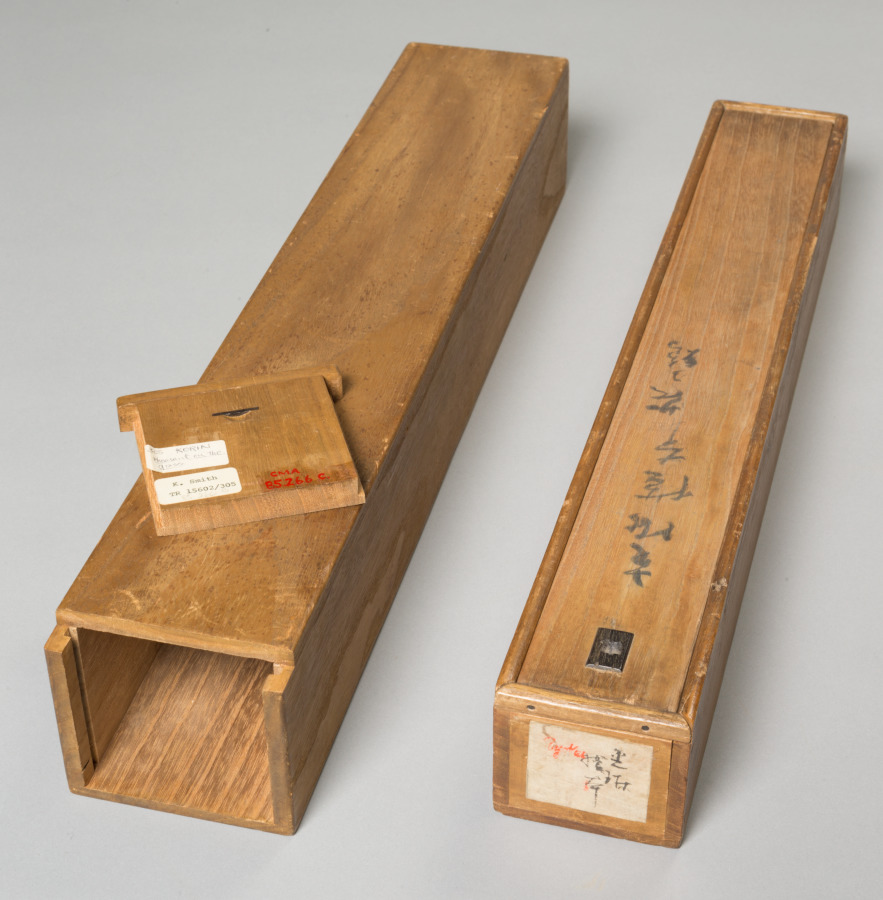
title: Pheasant and Grasses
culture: Japan, Edo period (1615–1868)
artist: attributed to Ogata Kōrin (Japanese, 1658–1716)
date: late 1600s–early 1700s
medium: hanging scroll; ink and color on paper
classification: Painting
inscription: two seals of artist, lower right.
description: Korin was a founder of the Rimpa (decorative) school of painting and was a keen observer of nature. The pheasant is often associated with autumn.